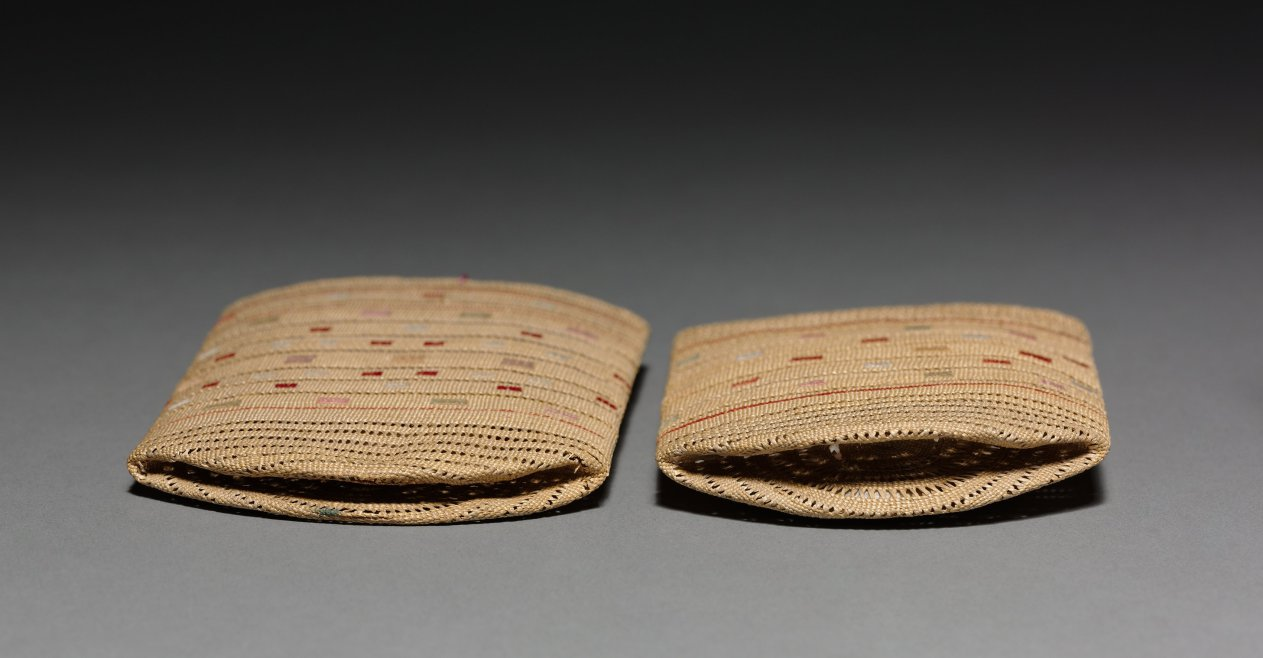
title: Cigarette or Needle Case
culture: Arctic, Aleut, Attu, Post-Contact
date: c 1875– 1917 (source unknown)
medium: plain twine, wild rye grass with crossed openwork, patterned twined start, intersecting layered spokes, and plaited finish; silk embroidery (catalogue card)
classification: Basketry